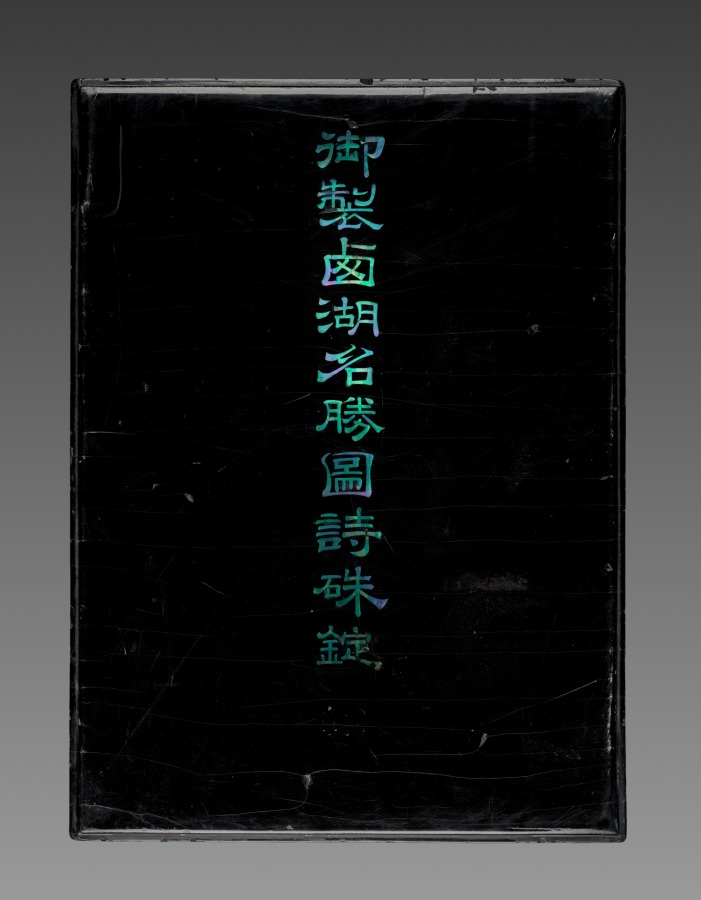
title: Imperially Commissioned Set of Ink Sticks with Images and Poems of Famous West Lake Sites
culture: China, Qing dynasty (1644–1911), Qianlong reign (1736–95)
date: 1780–94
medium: Molded ink in yellow, blue, black, green, red, brown, white, and gold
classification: Miscellaneous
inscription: 乾隆年製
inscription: The inscription in mother of pearl inlay on the box’s cover says: Imperially Made Gold Inscribed Poems of Images of [the Ten] Sights of the Westlake.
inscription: The poems on the ink sticks are published in Yuzhi shiji 御製詩集 [Collection of imperial poetry], vol. 4, juan 71, 6b–8b; and Qinding nanzun shengdian 欽定南巡盛典 [Grand ritual of the southern tour], juan 17, 17b–28b.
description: Each ink stick depicts one of the Ten Scenes of the West Lake on one side, and a corresponding imperial poem on the other, composed on emperor Qianlong’s fifth southern inspection tour in 1780. Notably, the ink sticks’ colors and shapes correspond with the poems’ respective content. An inscription on one ink stick identifies this set as a gift to the emperor by Jiang Lan, an official from Anhui, a province known for its excellence in ink, paper making, and printing. Imperial records note that 10 more sets of West Lake inks were presented as a tribute by Gioroi Giking (Chinese: Jueluo Jiqing, 1753–1802), a Zhejiang provincial governor and a bannerman (Manchu native).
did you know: The inscription in mother-of-pearl inlay on the box’s cover says: Imperially Made Gold Inscribed Poems of Images of [the Ten] Sights of the Westlake.